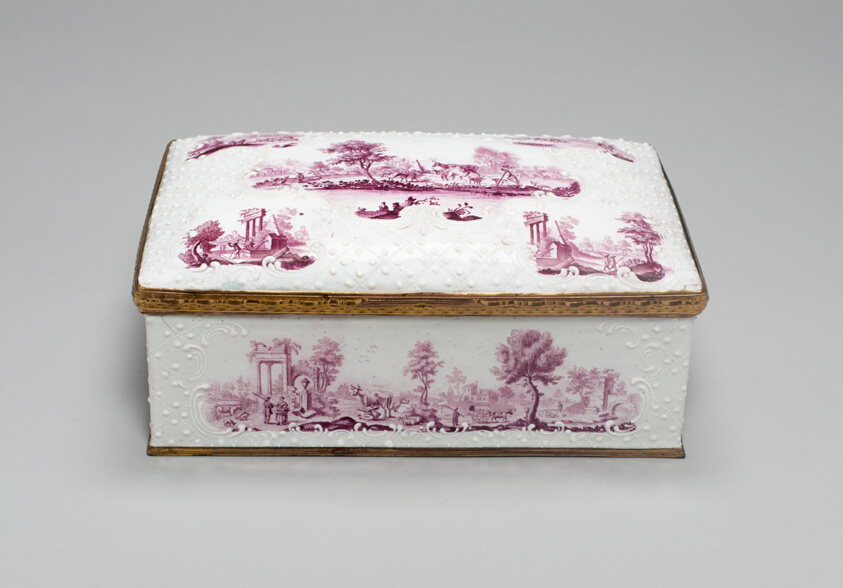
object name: Metalwork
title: Casket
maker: England, Battersea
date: 1750/99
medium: Metal and enamel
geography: Battersea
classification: enamel; metalwork